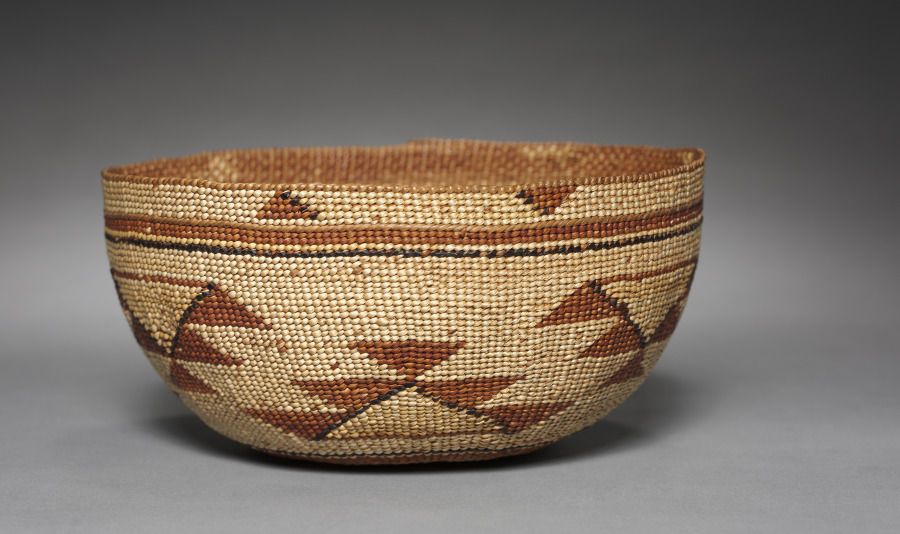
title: Hat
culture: California, late 19th- early 20th century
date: c 1875–1917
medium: plain-twined hazel with decoration in beargrass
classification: Basketry